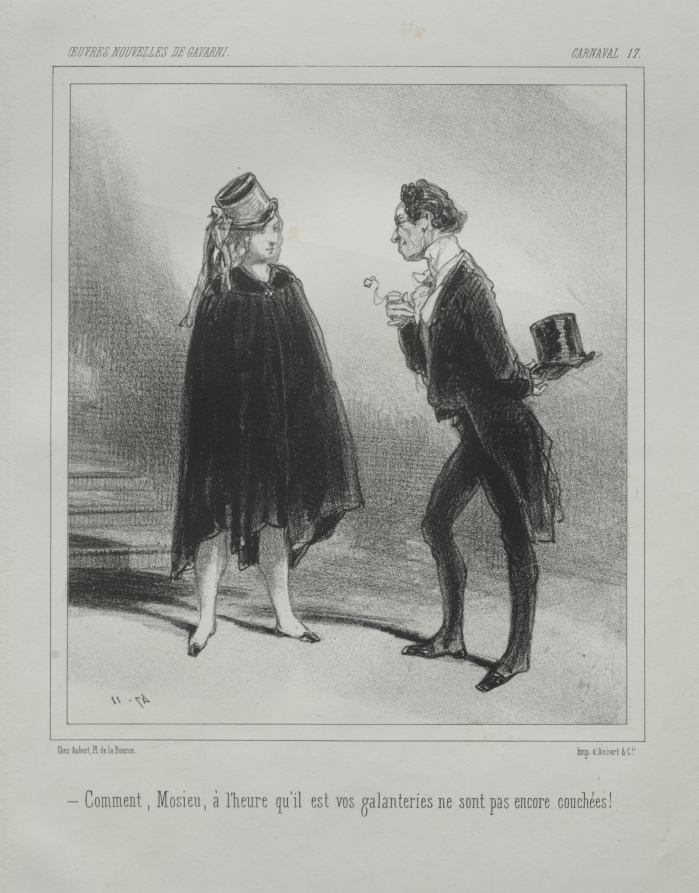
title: Carnaval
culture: France, 19th century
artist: Paul Gavarni (French, 1804–1866)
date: c. 1841–47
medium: lithograph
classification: Print